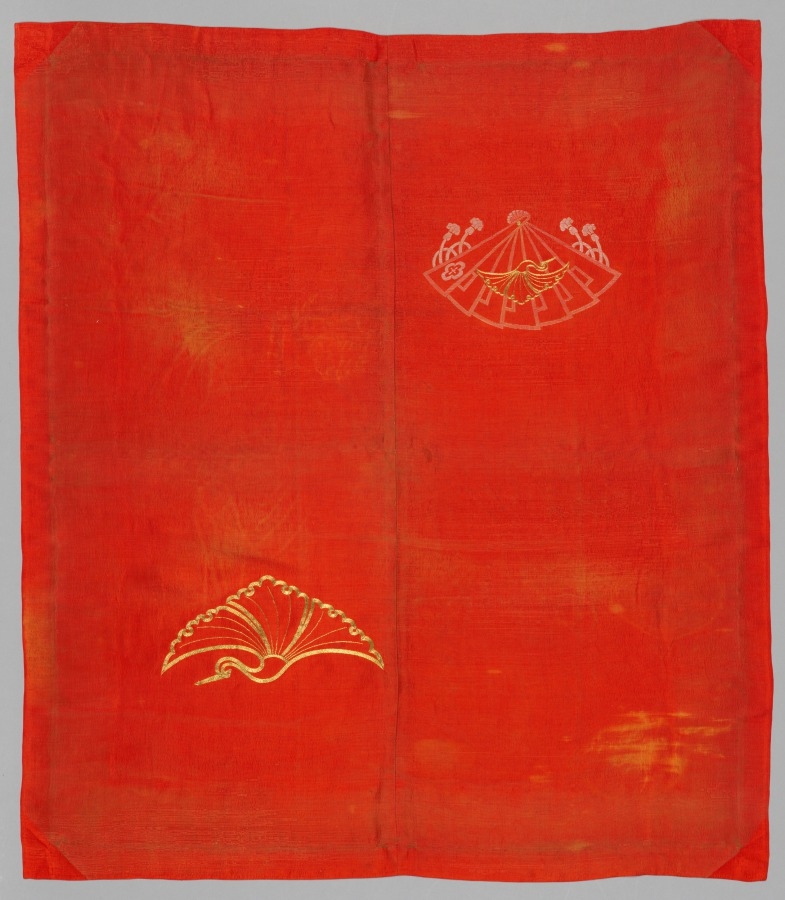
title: Embroidered and Resist-Dyed Fabric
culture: Japan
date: late 1800s-early 1900s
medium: embroidered silk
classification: Embroidery